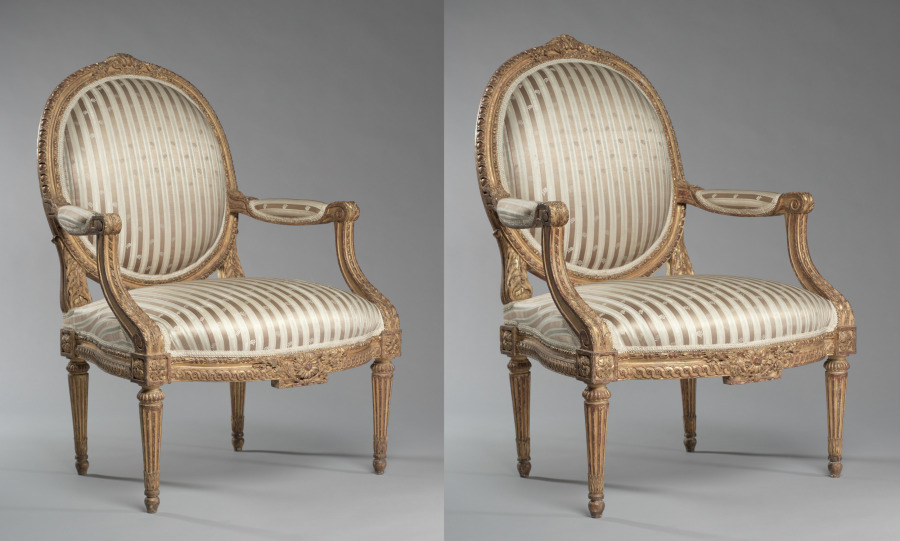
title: Pair of Armchairs (Fauteuils)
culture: France, 18th century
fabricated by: Jean-Baptiste II Tilliard (French, 1797)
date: c. 1765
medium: carved and gilded wood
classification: Furniture and woodwork